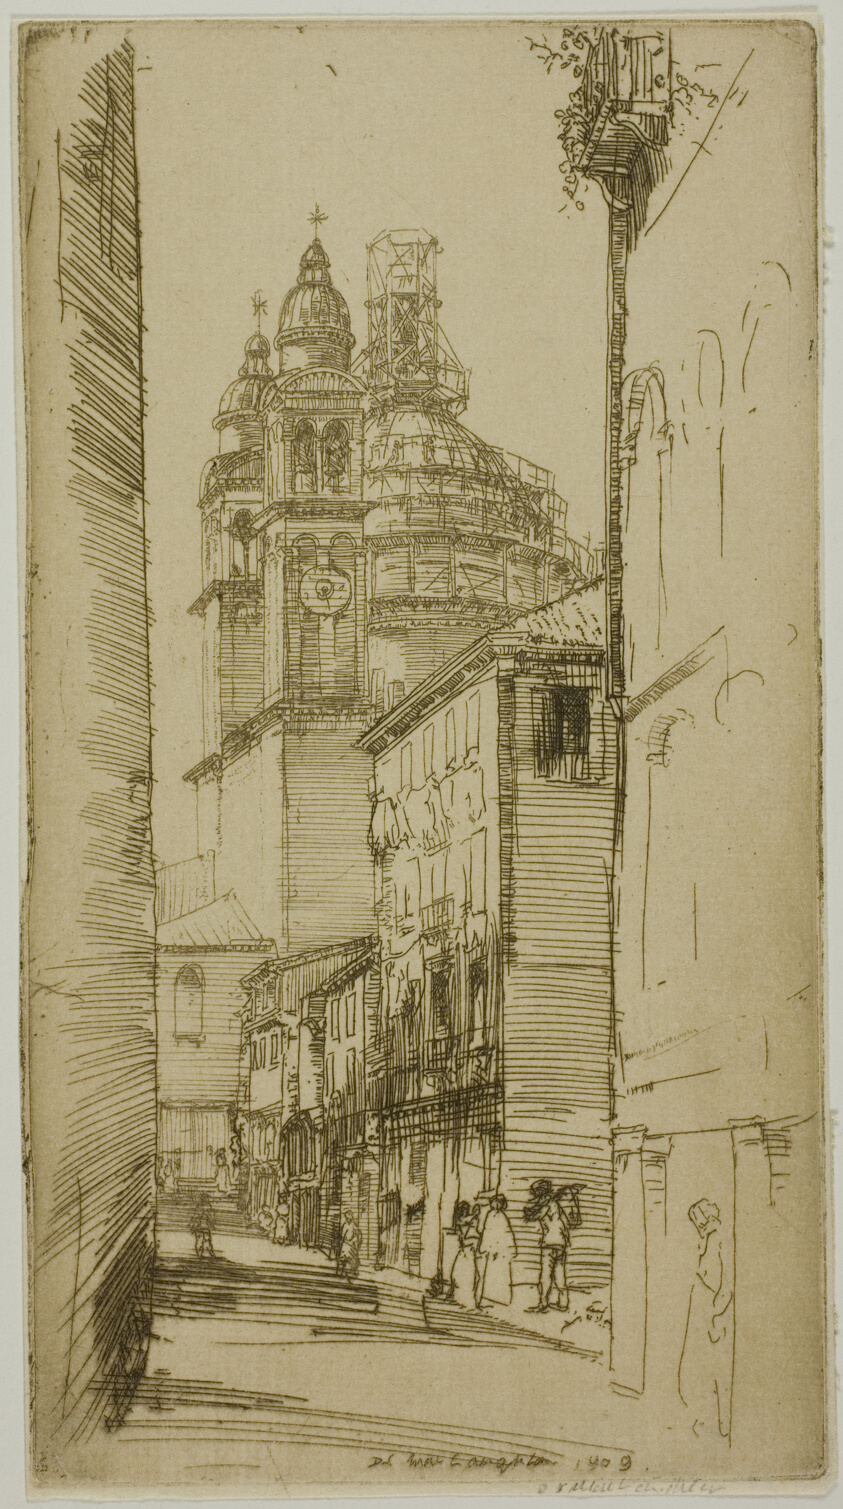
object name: Print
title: The Salute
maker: Donald Shaw MacLaughlan (American, born Canada, 1876-1938)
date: 1909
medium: Etching in siena on cream laid paper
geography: United States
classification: etching; print; prints and drawing